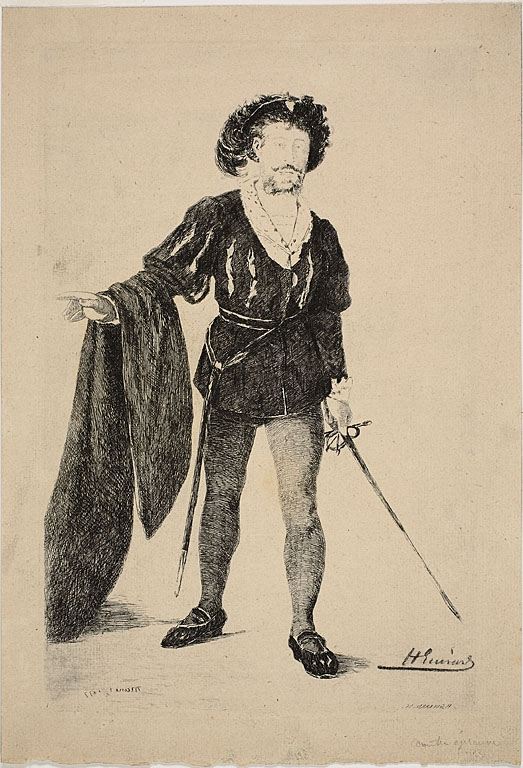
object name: Print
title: Faure in the Role of Hamlet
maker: Henri Charles Guérard (French, 1846-1897); after Édouard Manet (French, 1832-1883)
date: c. 1877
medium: Etching on cream laid paper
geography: France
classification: etching; print; prints and drawing